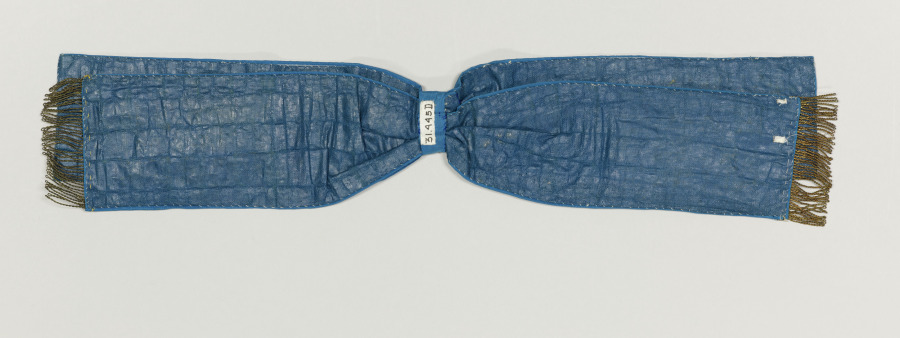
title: Woman's Costume (Blue Silk Band)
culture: Italy, Sicily, 19th century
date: 1800s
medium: silk (blue) with metal thread embroidery and sequins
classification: Garment